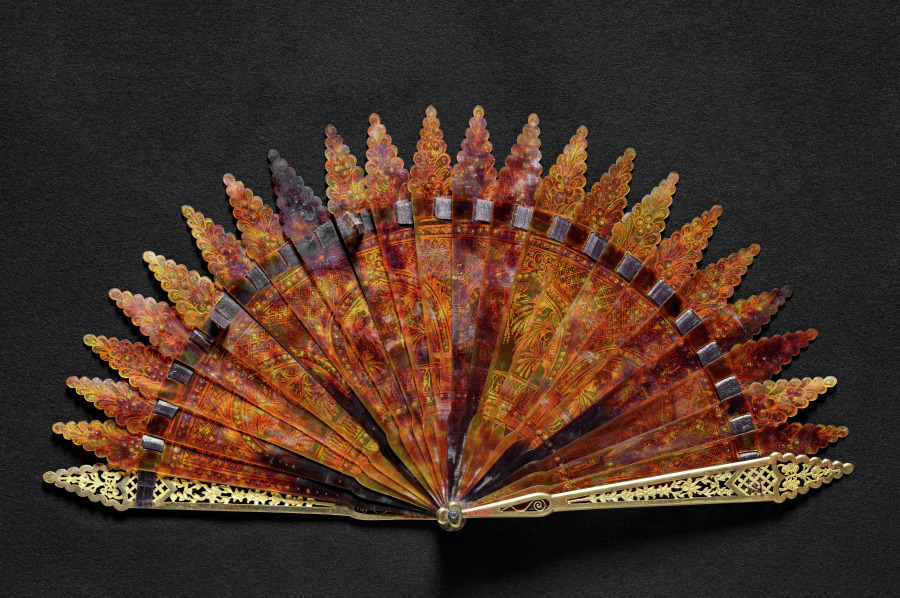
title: Fan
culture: France, 18th-19th century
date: 1700s - 1800s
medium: tortoise shell with pierced gilt metal for outer sticks, elaborate gilt decoration and spangles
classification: Miscellaneous